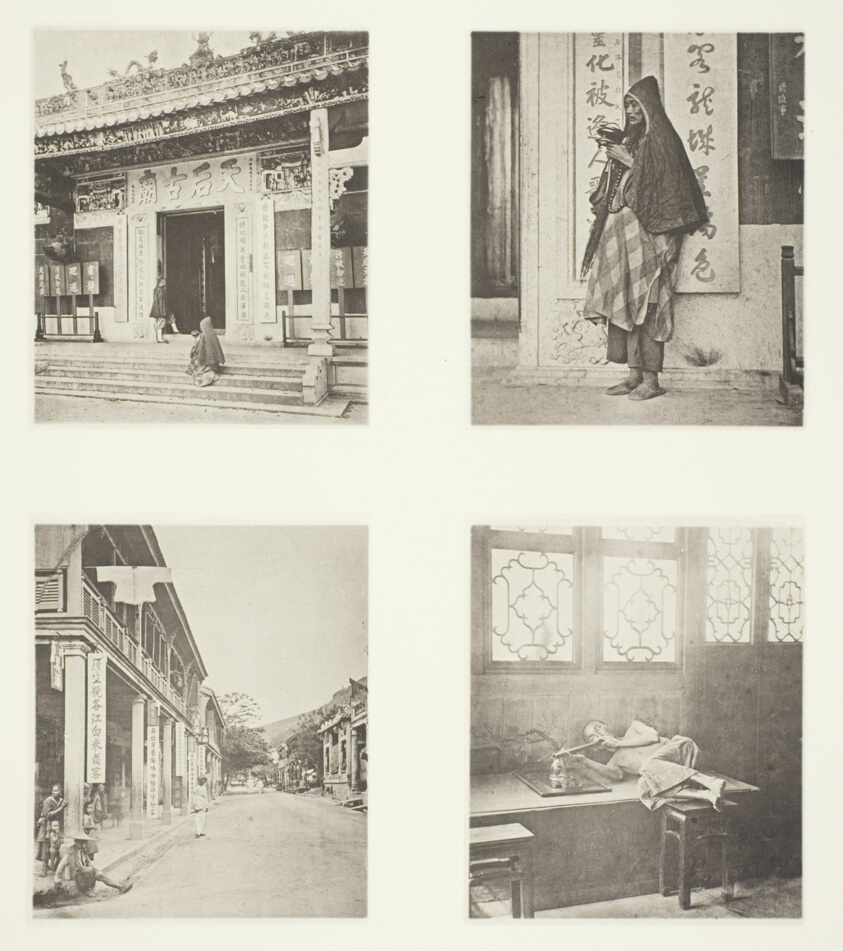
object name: Photograph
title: Front of Kwan-Yin Temple, Hong-Kong; A Mendicant Priest; A Street in Hong-Kong; Opium-Smoking in a Restaurant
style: 19th century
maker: John Thomson (Scottish, 1837–1921)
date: c. 1868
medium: Collotype, pl. IX from the album "Illustrations of China and its People, Volume I" (1873)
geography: Scotland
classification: photography; photograph